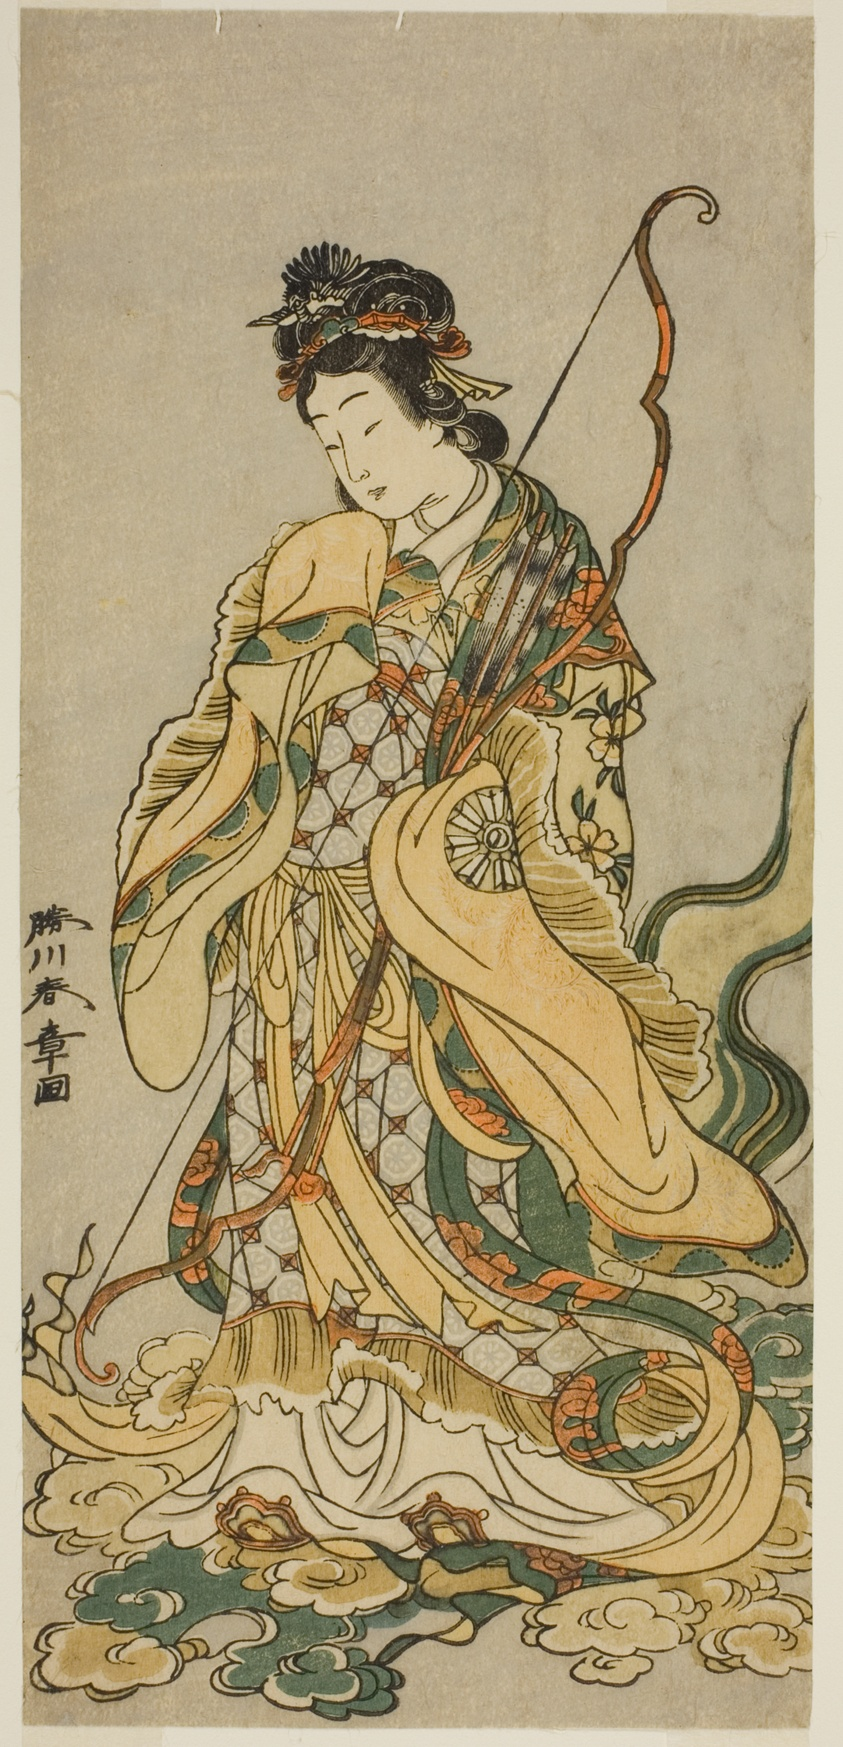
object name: Print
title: The Actor Nakamura Noshio I as the Goddes Benzaiten of Enoshima in the Play Onno Aruji Hatsuyuki no Sekai, Performed at the Morita Theater in the Eleventh Month, 1773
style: Japanese (culture or style)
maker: Katsukawa Shunsho 勝川 春章; Japanese, 1726-1792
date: c. 1773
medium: Color woodblock print; hosoban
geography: Japan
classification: woodblock print; print; asian art